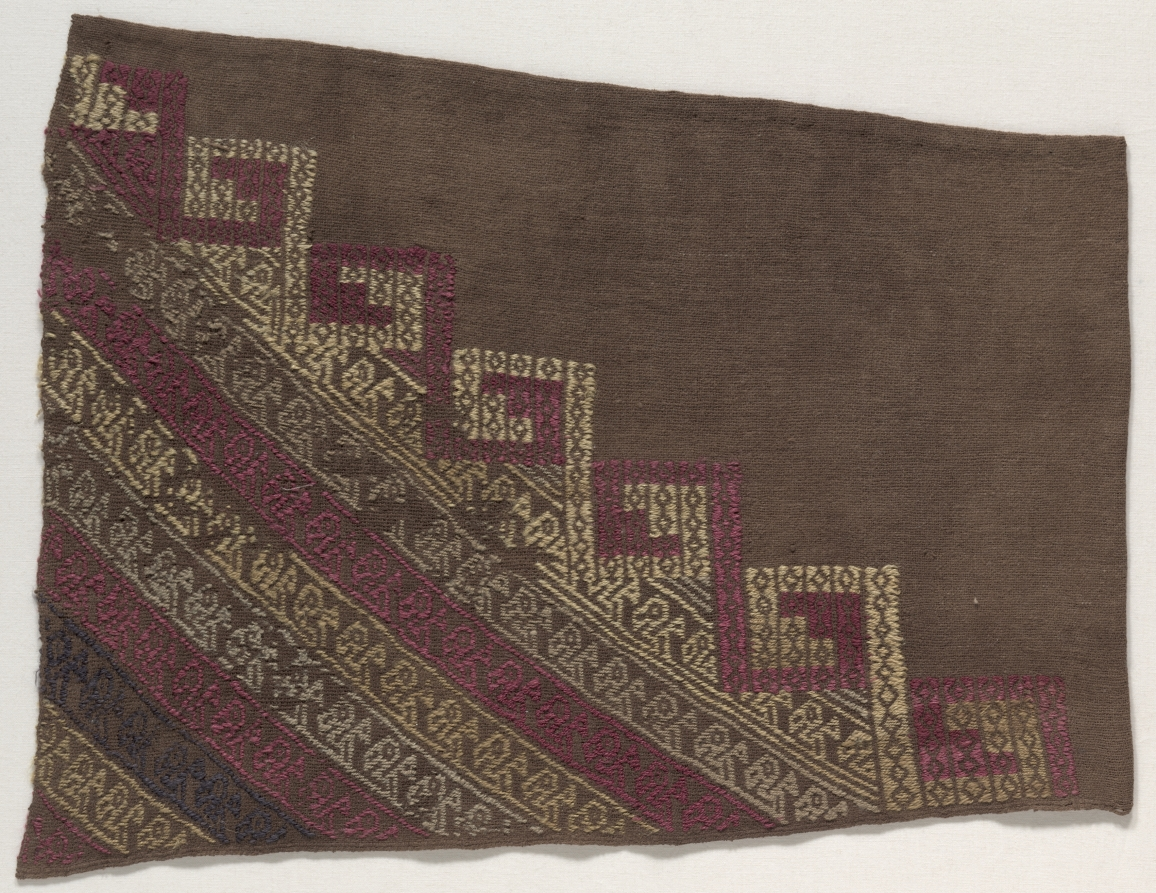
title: Fragment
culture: Peru, Central Coast, Chancay, 12th-15th century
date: c. 1100–1400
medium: tabby, brocaded; cotton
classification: Textile